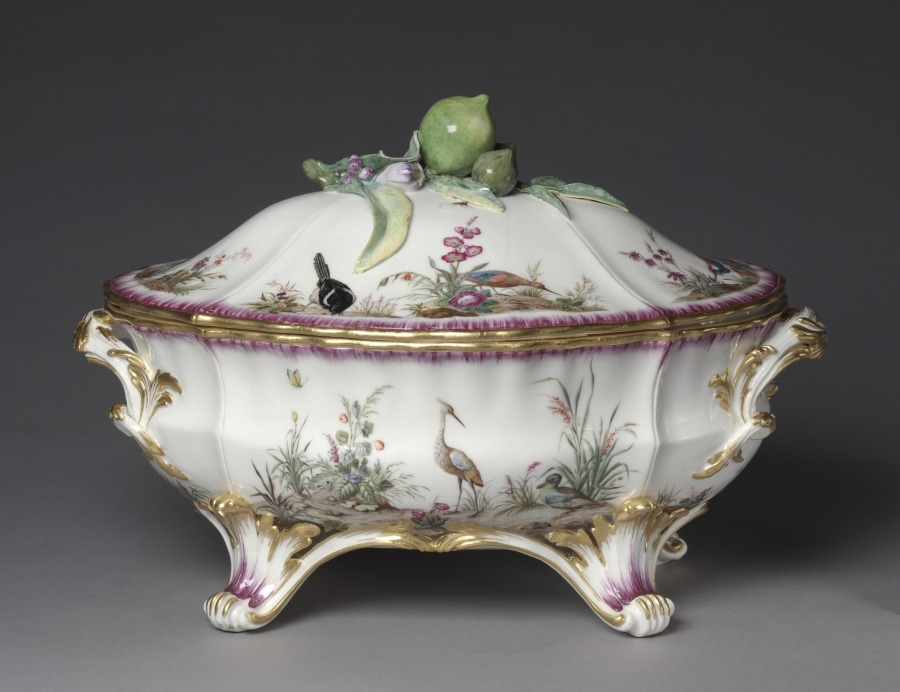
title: Covered Tureen (Terrine ancienne or Terrine ordinaire)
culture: France, Vincennes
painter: attributed to Louis-Denis Armand (French, active c. 1745–1783)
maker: Vincennes Porcelain Factory (France, 1740–56)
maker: probably by Jean-Claude Duplessis le Père (French, 1690–1774)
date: c. 1752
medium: soft-paste porcelain with enamel and gilt decoration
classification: Ceramic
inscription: [Interlaced foliate 'L's surmounted by a fleur-de-lys (indicating royal commision), in blue]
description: The intricately painted birds that decorate this tureen are the work of Louis-Denis Armand. Armand was known for his depictions of birds and landscapes, a specialty that may have come from his work as a painter of lacquered furniture with similar compositions. This tureen was likely designed by master goldsmith Jean-Claude Duplessis who began working as an artistic director at the Vincennes Porcelain Factory in 1748.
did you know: This object was manufactured in soft-paste porcelain, a material used by many European porcelain factories before they were able to emulate the hard-paste porcelain of China and Japan.